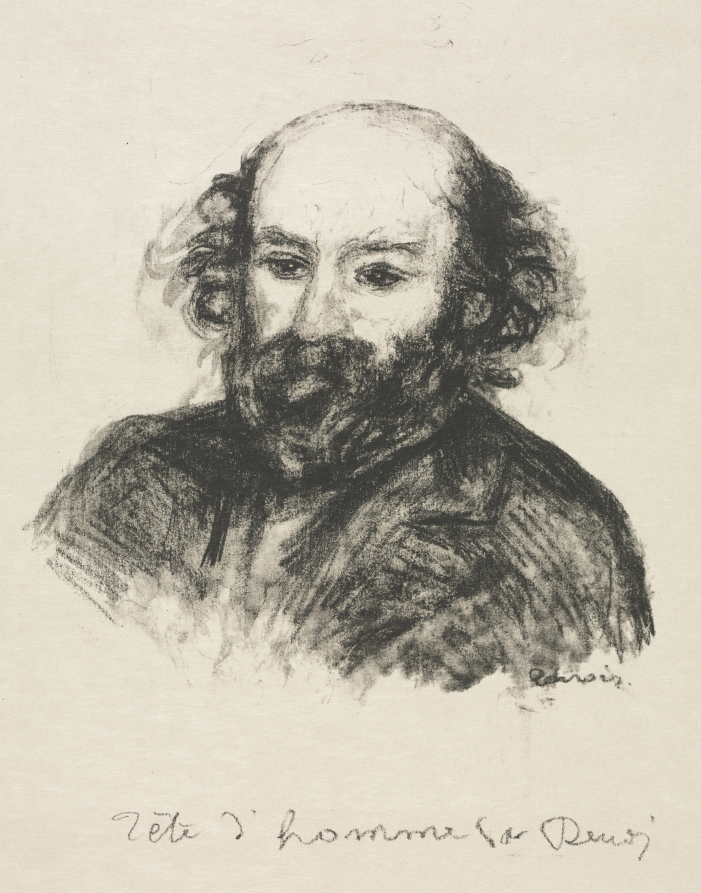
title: Paul Cézanne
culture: France, 19th century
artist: Pierre-Auguste Renoir (French, 1841–1919)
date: c. 1902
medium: lithograph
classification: Print